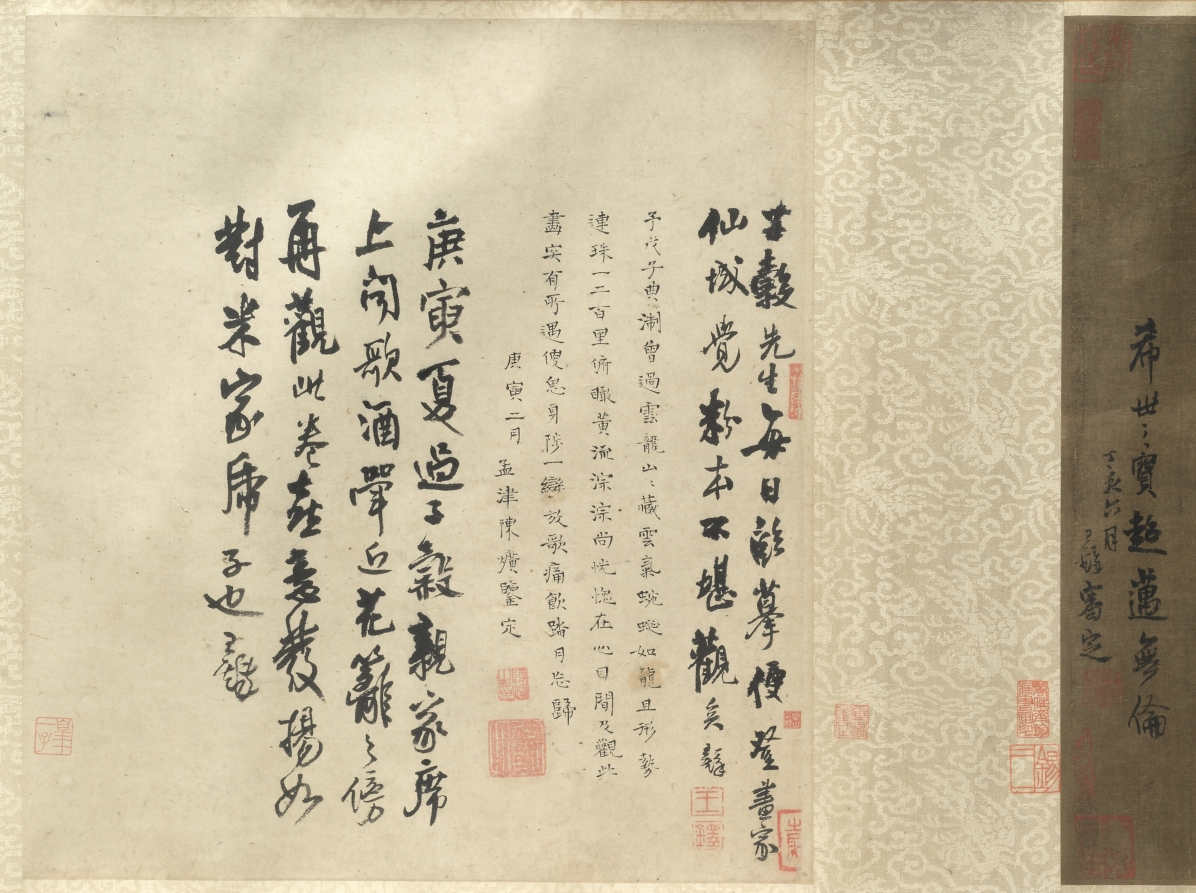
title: Cloudy Mountains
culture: China, Southern Song dynasty (1127-1279)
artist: Mi Youren (Chinese, 1072–1151)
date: 1130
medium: Handscroll; ink and color on silk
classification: Painting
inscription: 好山無數接天涯，烟靄陰晴日夕佳。/ 要識先生會到此，故留筆戲在君家。/ 庚戍歲，辟地新昌作。元暉。/ [seal] 元暉戲作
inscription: [Seal] 安陽孫氏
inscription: [Seal] 畢瀧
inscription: [Seal] 成親王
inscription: [Seal] 永瑆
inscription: [Seal] 錫三 appears twice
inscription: [Seal] 養性齋珍藏書畫印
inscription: [Seal] 芷陔審定真跡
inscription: [Seal] 玉簡齋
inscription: 2 colophons (1 dated 1650), inscription dated 1647, and 2 seals of Wang To (1592–1652)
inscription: 1 colophon, dated second month of the gengyin year 庚寅 (1650), and 2 seals of Chen Kuang 陳爌 (1646 jinshi degree)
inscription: 7 seals unidentified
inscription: A separate scroll containing six colophons on Cloudy Mountains exists; the inscribers are Luo Zhenyu 羅振玉 (1866–1940), Naito Torajiro 內藤虎次郎 (1866–1934), Nagao Ko 長尾甲 (1864–1942), and Wu Changshuo 吳昌碩 (1844–1927). Naito Torajiro alone wrote three colophons.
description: Cloudy Mountains captures the view of a lush and misty riverscape, an impression of Mi Youren’s new environment, painted in a moment of peace. With the fall of the Northern Song dynasty in 1127 upon the Jurchen’s military invasion, Mi Youren fled south across the Yangzi River. In 1130, he had reached Xinchang in Zhejiang province and thanked his host with this painting for having given him shelter. Mi Youren was the oldest son of the art critic Mi Fu (1051– 1107); both developed a distinct style of mountain scenery by accumulating wet ink dots that create a hazy atmosphere.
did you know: This scroll is one of the museum’s earliest dated Chinese paintings.